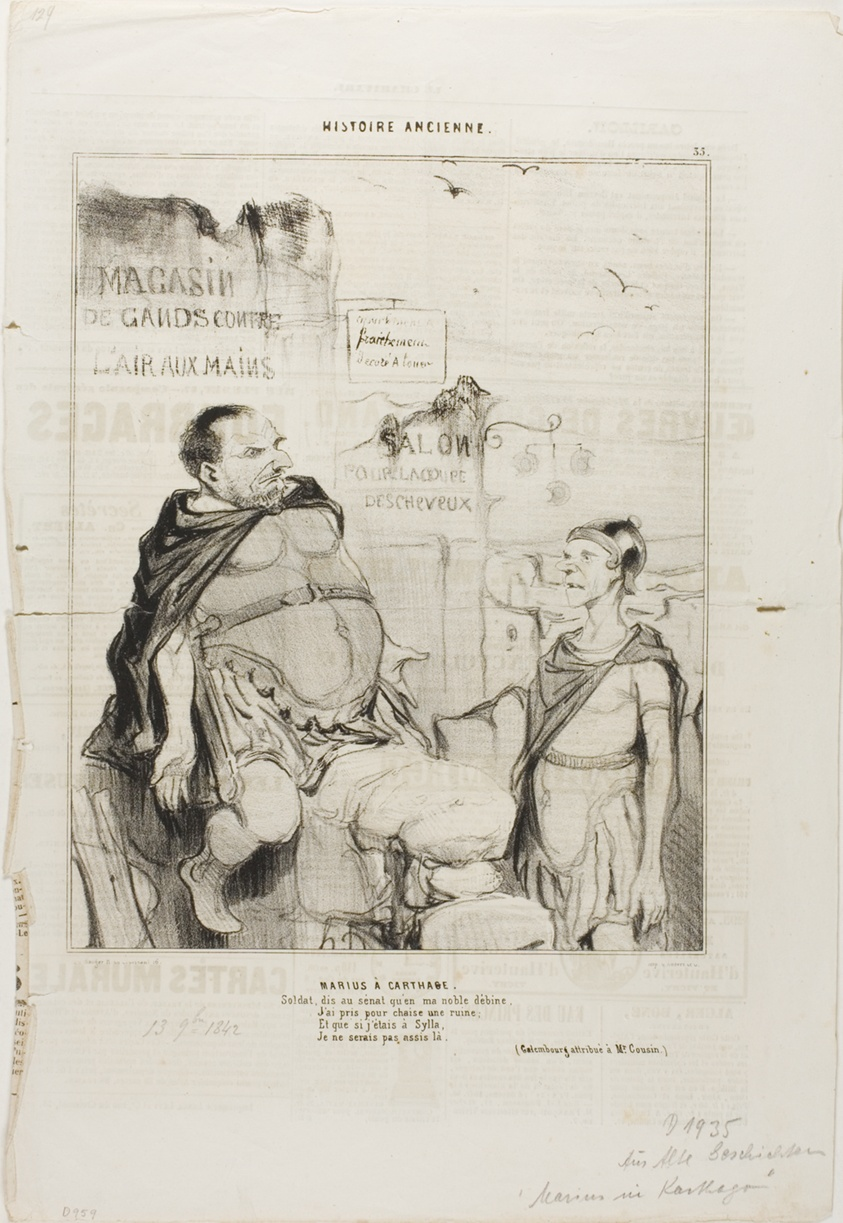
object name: Print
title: Marius At Carthage. Soldier, say to the senate that in my noble poverty I have taken for a chair a ruin And if I were in Sylla I would not be sitting here. (Pun attributed to M. Cousin), plate 35 from Histoire Ancienne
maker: Honoré Victorin Daumier; French, 1808-1879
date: published November 13, 1842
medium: Lithograph in black on cream wove paper, with text added in another hand and letterpress verso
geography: France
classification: lithograph; print; prints and drawing